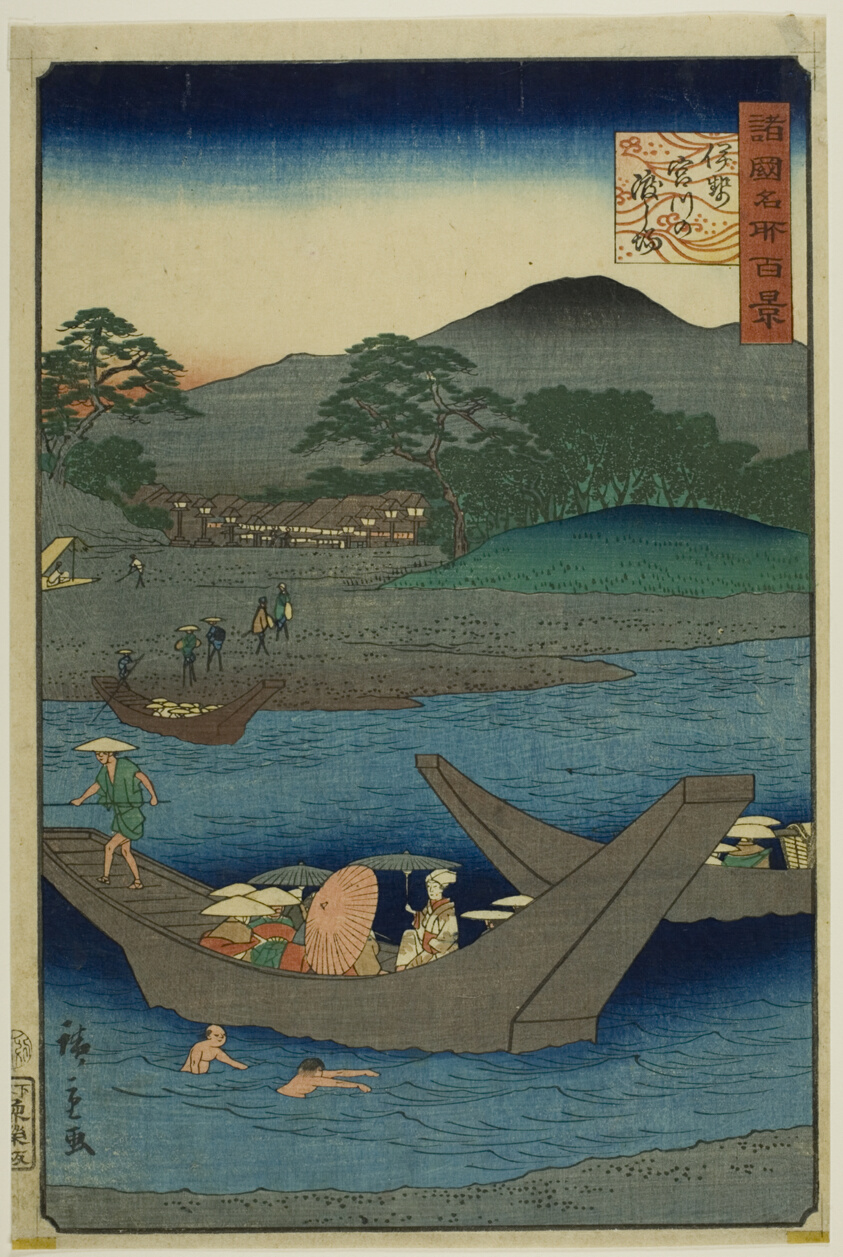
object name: Print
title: The Ferry Landing on Miya River, Ise Province (Ise Miyakawa no watashiba) from the series “One Hundred Famous Views in the Various Provinces (Shokoku meisho hyakkei)”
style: Japanese (culture or style)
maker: Utagawa Hiroshige II (Shigenobu) (Japanese, 1826–1869)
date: 1859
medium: Color woodblock print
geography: Japan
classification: woodblock print; print